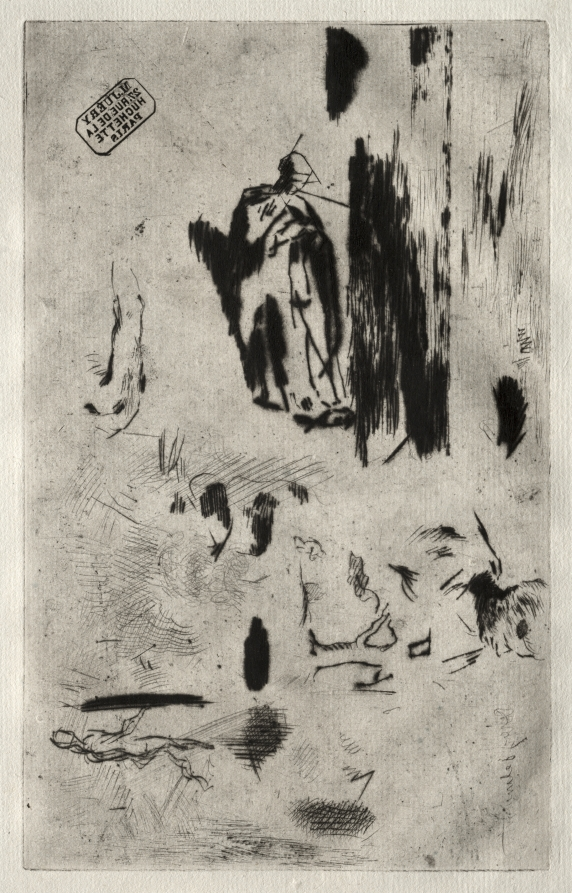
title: Plate with Sketches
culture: France, 19th century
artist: Jean-François Millet (French, 1814–1875)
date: c. 1855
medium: etching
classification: Print